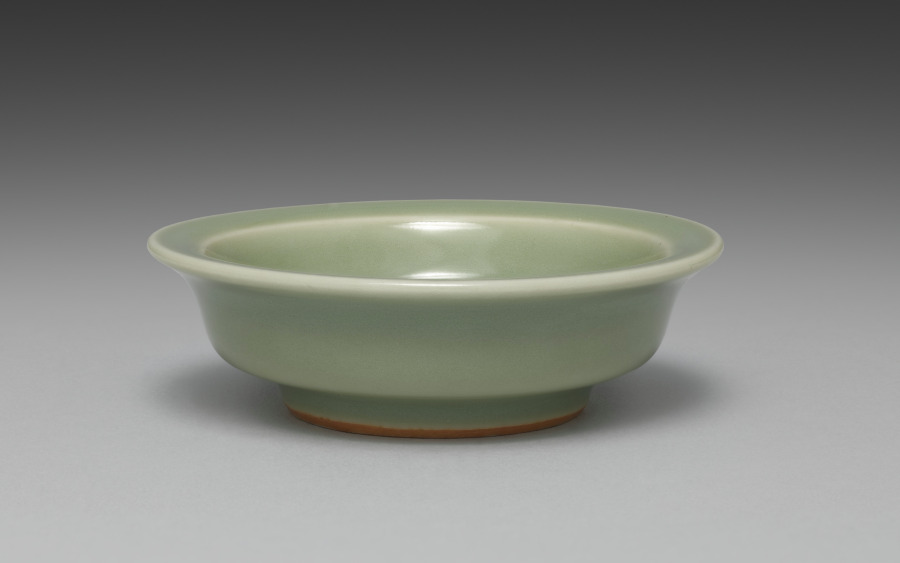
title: Saucer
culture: Japan, Meiji period (1868–1912)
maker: Seifū Yohei III (Japanese, 1851–1914)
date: 1893–1914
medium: One from a set of ten dishes; porcelain with green glaze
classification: Ceramic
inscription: 清風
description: Yohei III’s main output for his sophisticated clientele was in the form of tea sets and dining sets. He created a range of dishes in green glazes. He often produced in pairs, sets of five, or sets of ten. For this set of ten small dishes in a simple, round form that emphasizes the glaze above all, the box lid designates the piece as seiji, or green-glazed porcelain, using a general term for the extensive palette of green glazes often called celadon in English. The box lid further identifies the dishes themselves as tōchō, literally “bean-sized saucers,” a size that makes them suitable for dipping sauces.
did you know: The ten dishes in this set are stored in stacks of five in a two-compartment box.